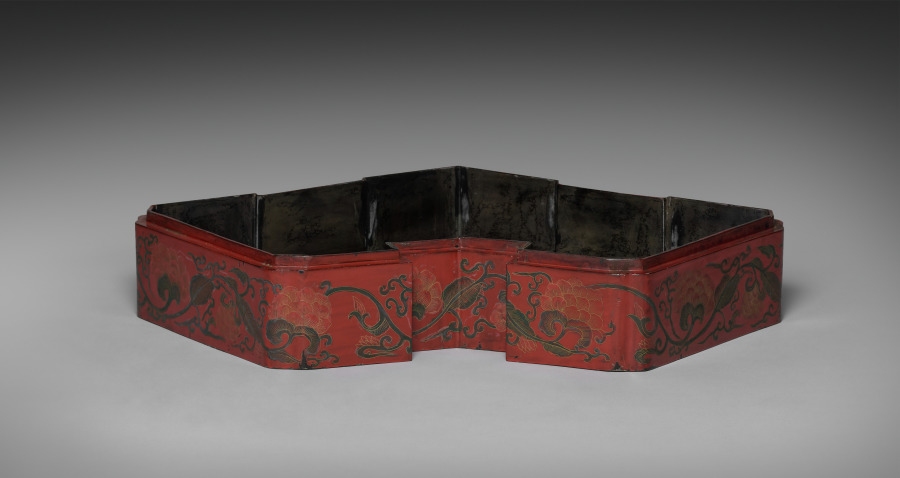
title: Upper Tier Box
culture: Japan, Edo period (1615–1868)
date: late 1700s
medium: red lacquer over a wood core, with litharge painting and engraved gold designs (Ryukyuan)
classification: Lacquer